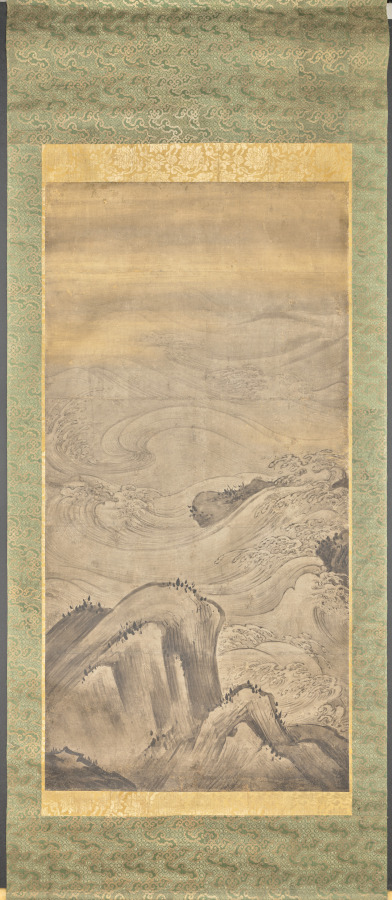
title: Rocks and Waves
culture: Japan, Muromachi period (1392–1573)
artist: attributed to Kano Motonobu (Japanese, c. 1476–1559)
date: early to mid-1500s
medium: sliding door fragment mounted as a hanging scroll; ink and gold wash on paper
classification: Painting